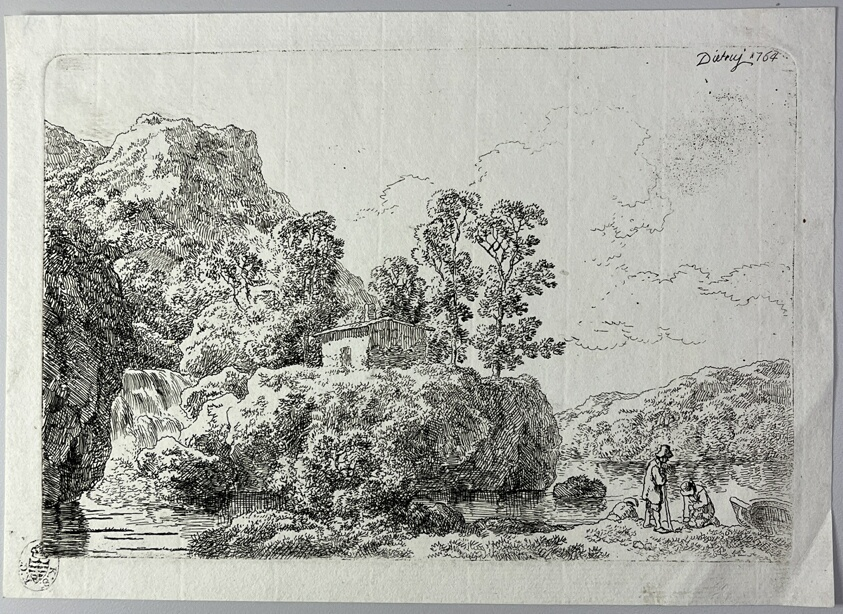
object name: Print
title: The Hut on a Rock Near a Stream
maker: Christian Wilhelm Ernst Dietrich (German, 1712-1774)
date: 1764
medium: Etching on laid paper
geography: Germany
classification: etching; print; prints and drawing